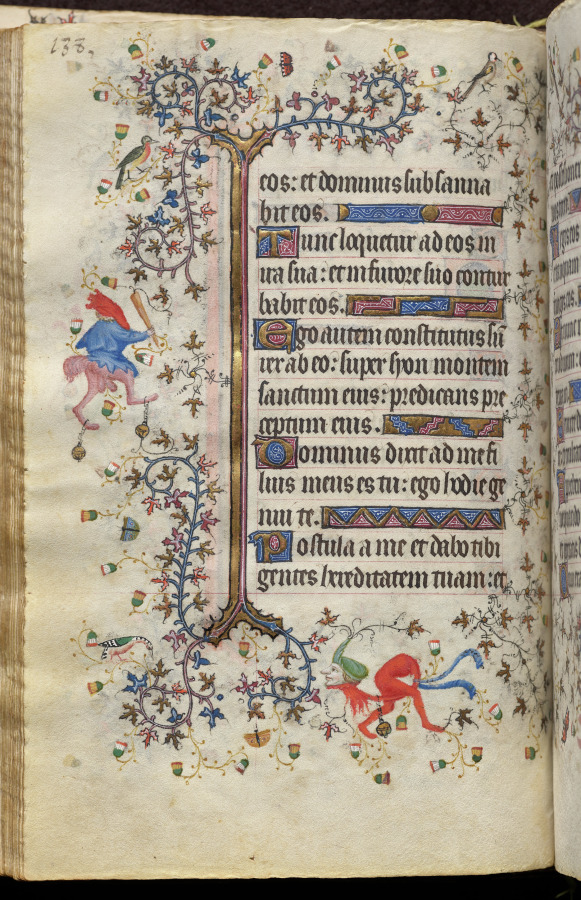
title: Hours of Charles the Noble, King of Navarre (1361-1425): fol. 69v, Text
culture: France, Paris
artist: Master of the Brussels Initials and Associates (French)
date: c. 1405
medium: ink, tempera, and gold on vellum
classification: Bound Volume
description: This precious volume was obviously highly prized by its owner, the French-born King of Navarre, who had his coat of arms painted on no less than twenty folios. Rather than directly commissioning this manuscript from a specific workshop, it seems that Charles the Noble acquired his book of hours -- perhaps ready-made for the luxury market -- while on a trip to Paris in 1404-05. A collaborative effort, six painting styles are evidenced within the pages of this codex, those of two Italians, two Frenchmen, and two Netherlanders. The painter who was responsible for the planning and decoration of the book, and who produced seventeen of the large miniatures, was a Bolognese artist known as the Master of the Brussels Initials. His principal assistant, responsible for most of the borders, was a Florentine who signed his name "Zecho" da Firenze on folio 208 verso.